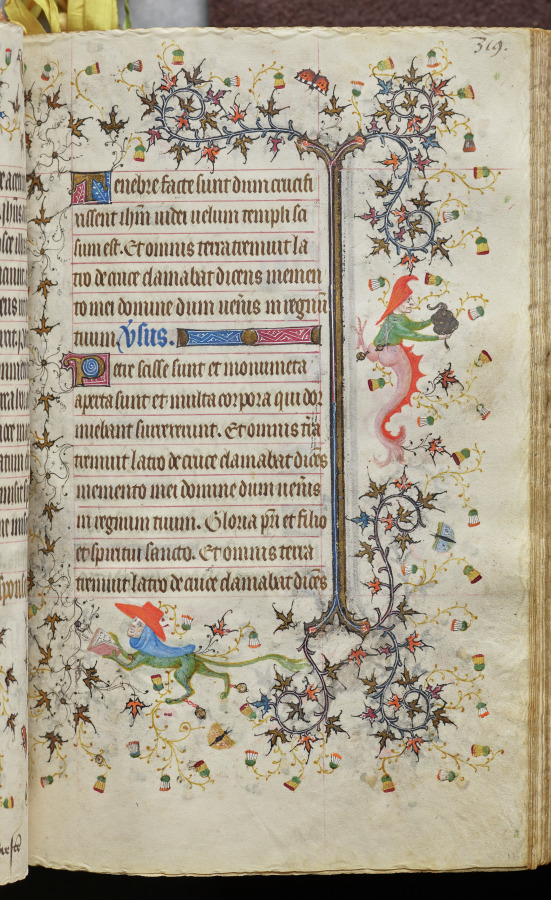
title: Hours of Charles the Noble, King of Navarre (1361-1425): fol. 160r, Text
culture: France, Paris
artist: Master of the Brussels Initials and Associates (French)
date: c. 1405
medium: ink, tempera, and gold on vellum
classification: Bound Volume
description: This precious volume was obviously highly prized by its owner, the French-born King of Navarre, who had his coat of arms painted on no less than twenty folios. Rather than directly commissioning this manuscript from a specific workshop, it seems that Charles the Noble acquired his book of hours -- perhaps ready-made for the luxury market -- while on a trip to Paris in 1404-05. A collaborative effort, six painting styles are evidenced within the pages of this codex, those of two Italians, two Frenchmen, and two Netherlanders. The painter who was responsible for the planning and decoration of the book, and who produced seventeen of the large miniatures, was a Bolognese artist known as the Master of the Brussels Initials. His principal assistant, responsible for most of the borders, was a Florentine who signed his name "Zecho" da Firenze on folio 208 verso.